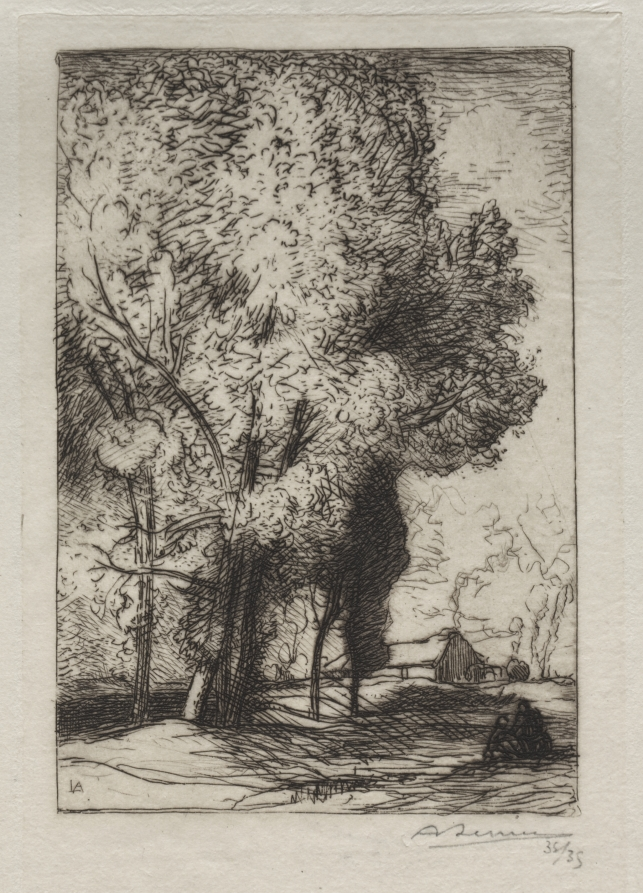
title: Bourrine dans les Peupliers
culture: France, 20th century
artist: Auguste Louis Lepère (French, 1849–1918)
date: 1911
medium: etching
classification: Print